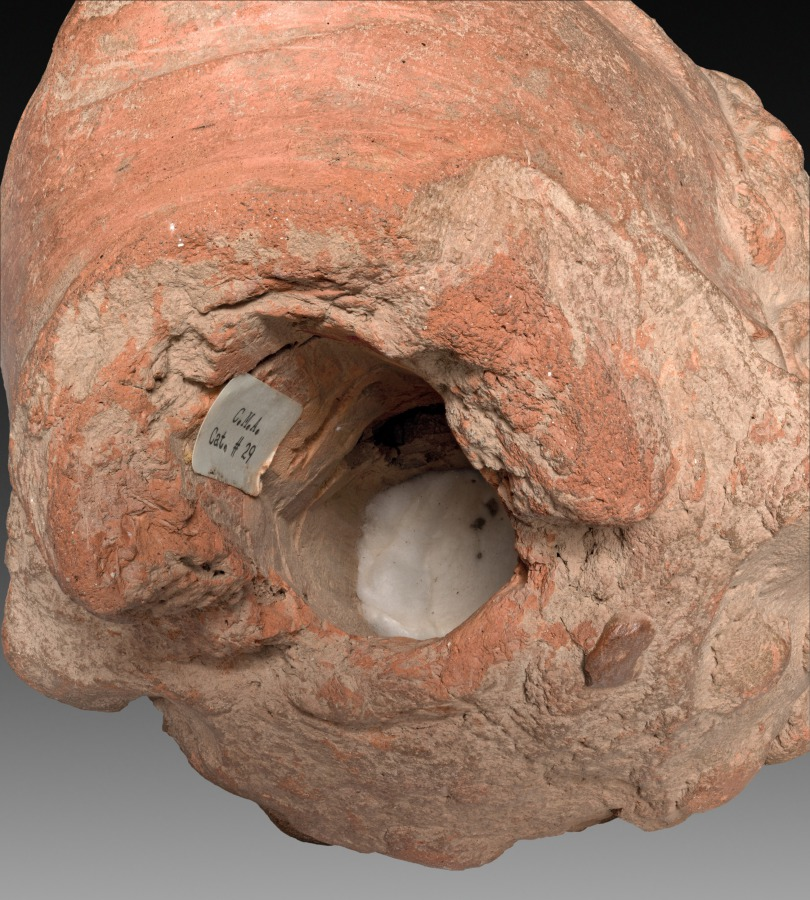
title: Head of Buddha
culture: India, Kashmir, Akhnur school, 8th century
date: 700s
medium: Clay, accidentally burned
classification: Sculpture